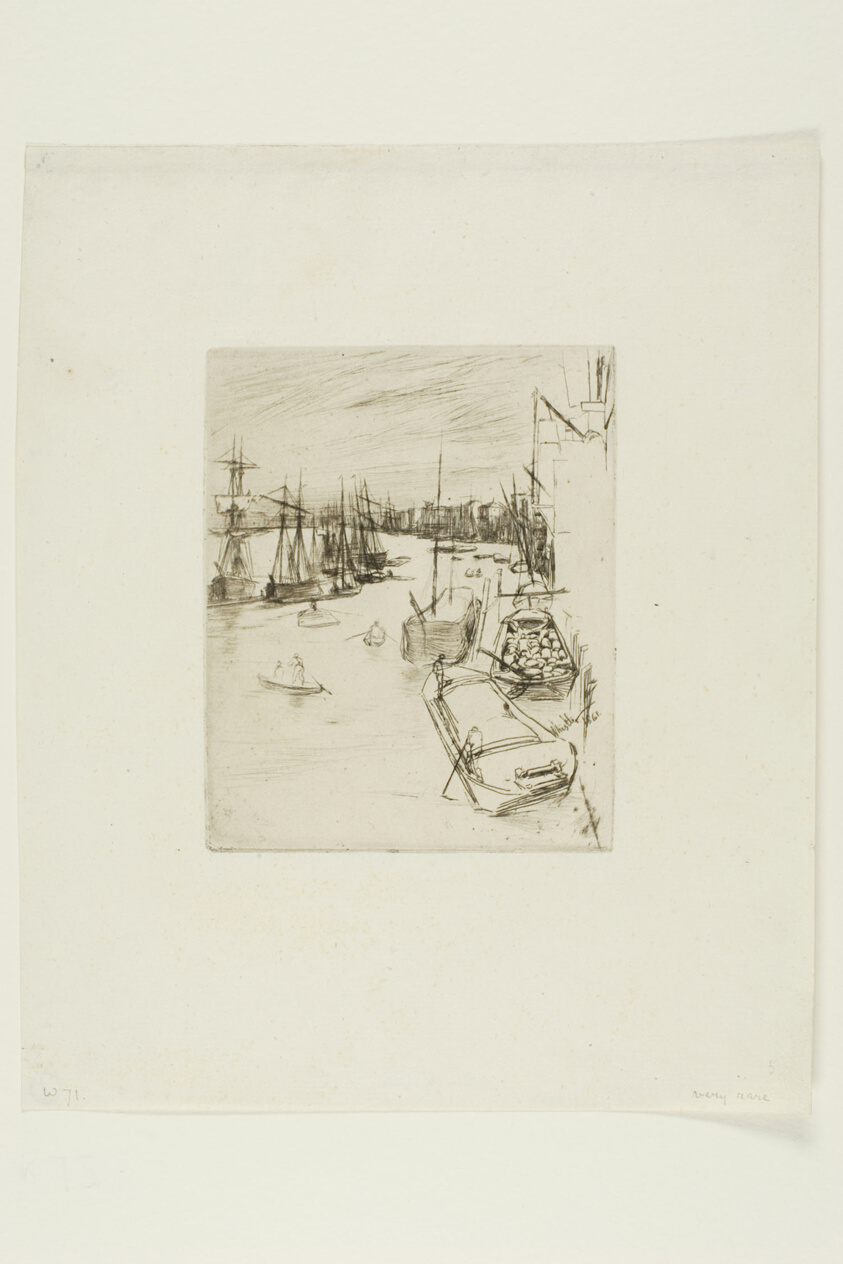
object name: Print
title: The Little Rotherhithe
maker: James McNeill Whistler (American, 1834-1903)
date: 1861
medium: Etching and drypoint with foul biting in dark brown ink on ivory laid paper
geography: United States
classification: etching; foul biting; drypoint; print; prints and drawing; paper